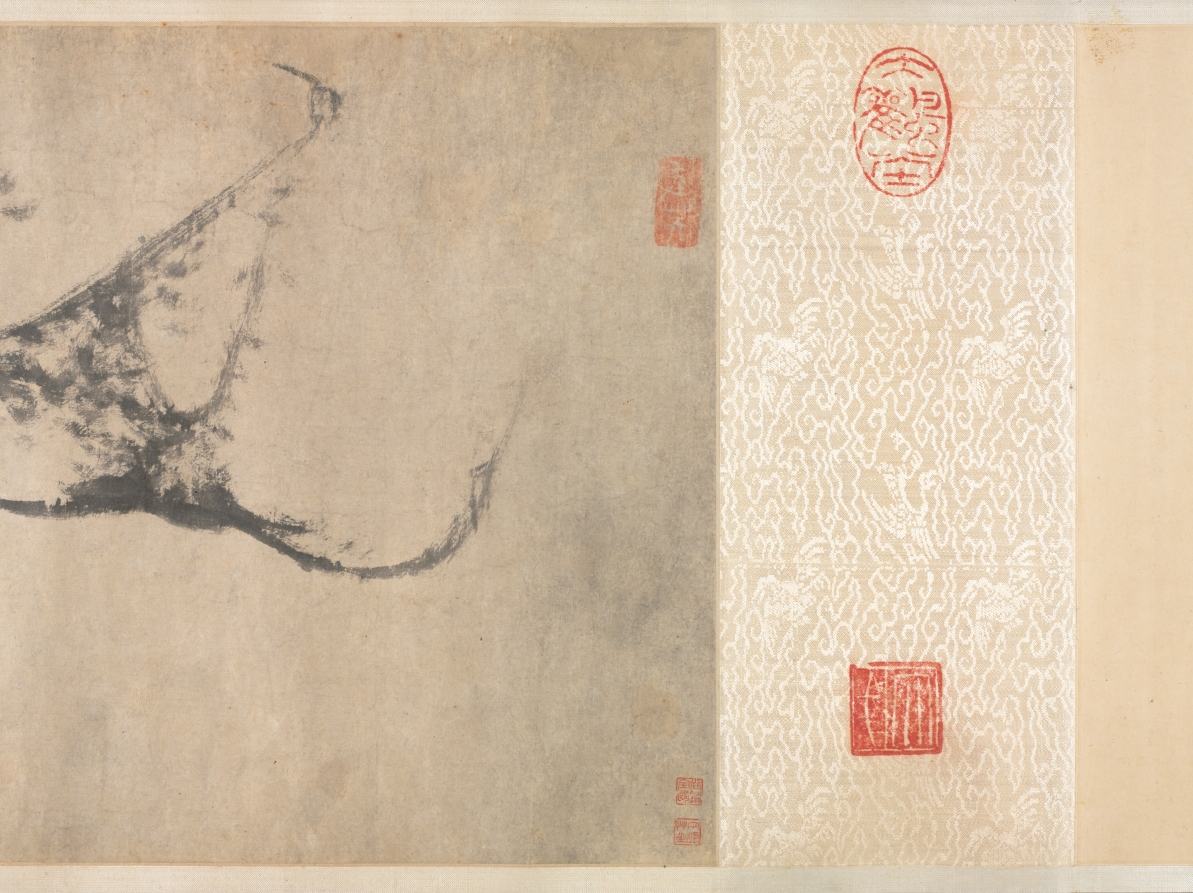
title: Fish and Rocks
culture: China, Qing dynasty (1644-1911)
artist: Bada Shanren (Chinese, 1626–1705)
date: mid- to late 1600s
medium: Handscroll; ink on paper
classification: Painting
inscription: 去天纔尺五，只見白雲行。 云何畫黃花，雲中是金城。 [印] 个山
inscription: 雙井舊中河，明月時延佇。 黃家雙鯉魚，為龍在何處。 [印] 个山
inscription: 三萬六千頃，畢竟有魚行。 到此一黃頰，海潮次上笙。 [印] 个山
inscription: 5 additional seals: 2 of Zhang Daqian 張大千 (1899–1983); 1 of Ta-an Chü-shih; 2 unidentified.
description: Bada Shanren, also called Zhu Da, a 17th-century painter who rejected conventions in favor of an individual, personal expression, is known for his unorthodox compositions of fish, flowers, birds, and rocks. Fish in his paintings are often looking upward toward heaven, swimming in a pond of undefined space. As a member of the Ming imperial family, Zhu Da lost his princely status and hid in a monastery when the Manchus, foreigners from the north, established the Qing dynasty in 1644. This scroll may have some autobiographical meaning, representing fish as leftover subjects (yimin) who lived in a void, having lost their roles in life after the fall of the dynasty.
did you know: After each poem, Bada Shanren used his so-called jixingyin seal 屐形印, which resembles the impression of a shoe on soft mud.